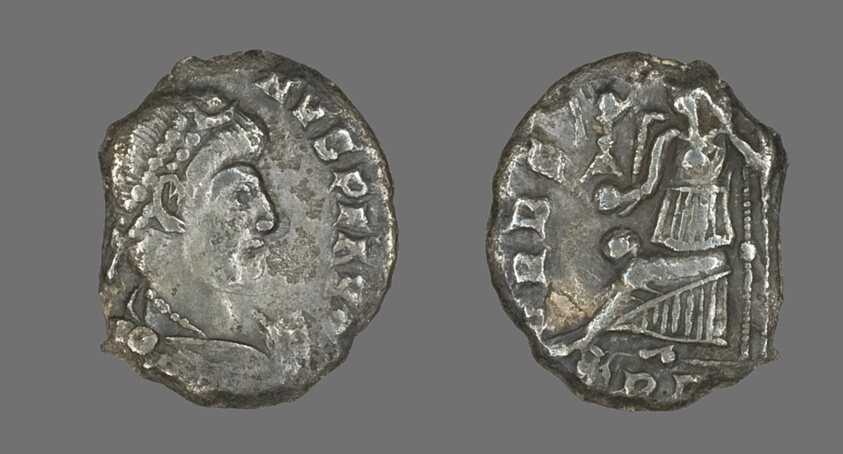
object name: Coin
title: Coin Portraying an Emperor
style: roman (ancient, style or period), ancient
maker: Roman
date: late 4th century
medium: Silver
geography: Roman Empire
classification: coin; ancient art